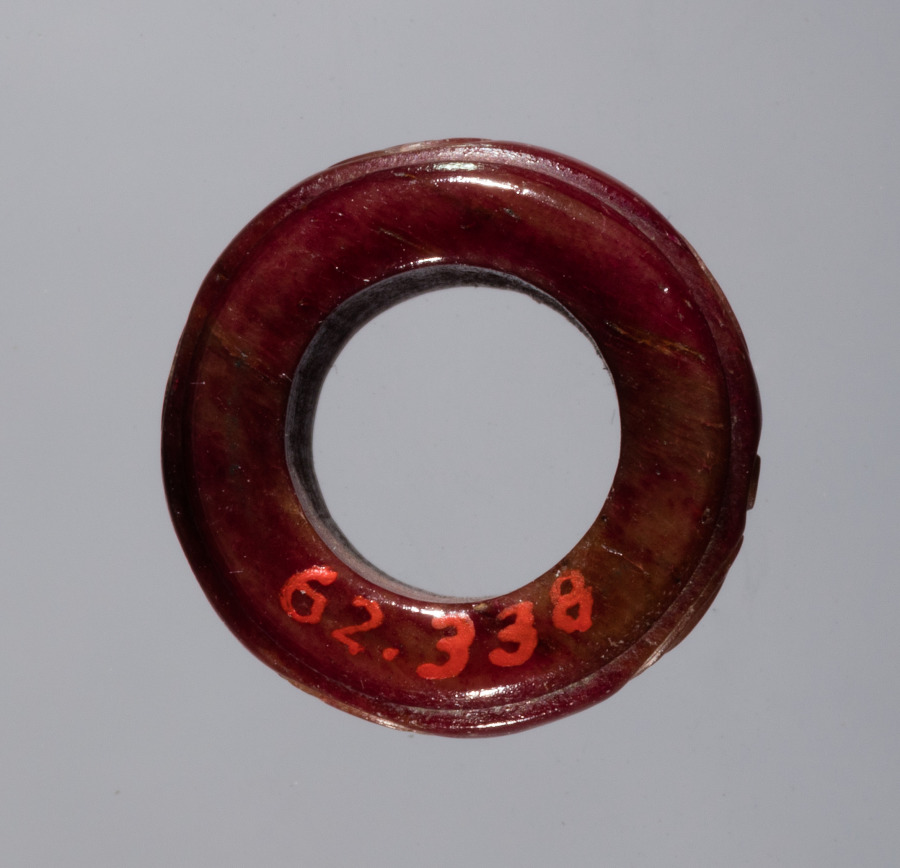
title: Spindle Whorl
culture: Iran, early Islamic period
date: 700s - 900s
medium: bone, incised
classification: Spindle Whorl